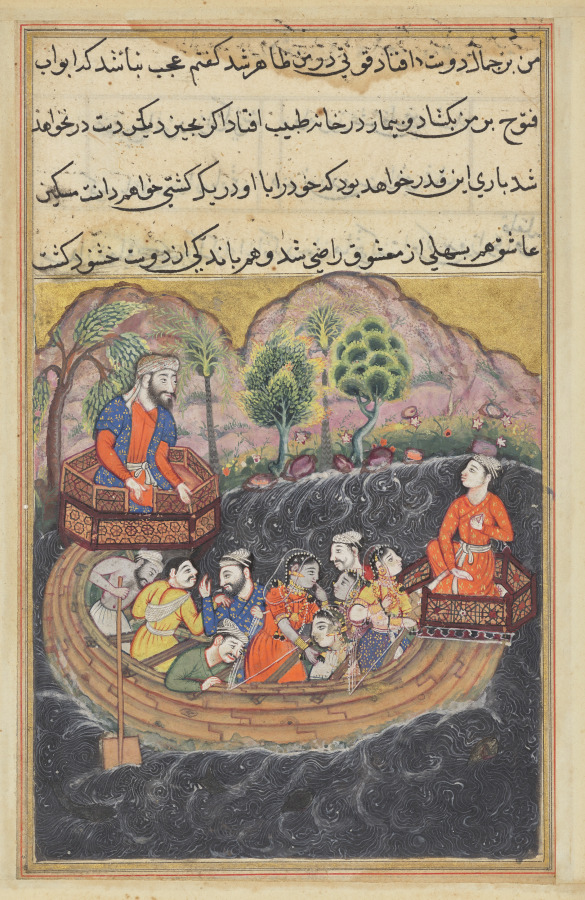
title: The young man of Baghdad joins the Hashimi’s boat as a sailor to find his slave-girl on board, from a Tuti-nama (Tales of a Parrot): Forty-eighth Night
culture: Mughal India, court of Akbar (reigned 1556–1605)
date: c. 1560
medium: gum tempera, ink, and gold on paper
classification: Painting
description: After losing all his possessions, the destitute young man joins the crew of a merchant ship. Upon boarding, he quickly realizes that this ship belongs to the same merchant who purchased his lover, the slave girl. She stands in the center of the boat, her finger raised in a gesture of shock, gazing toward her long-lost love.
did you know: The title “Hashimi” designates the bearer as a descendant of the Prophet Muhammad’s great-grandfather, Hashim.